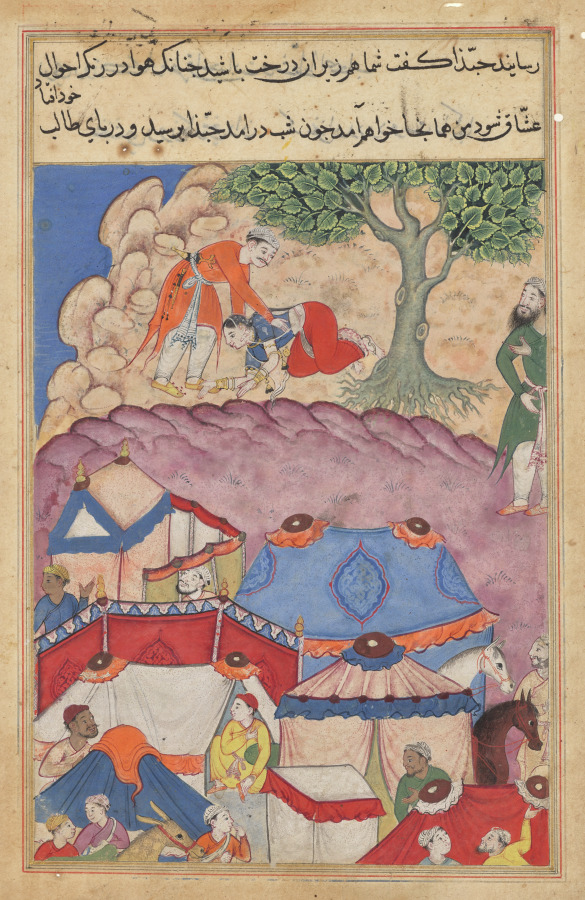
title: Habbaza meets Bashir under a tree, from a Tuti-nama (Tales of a Parrot): Twenty-fourth Night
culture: Mughal India, court of Akbar (reigned 1556–1605)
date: c. 1560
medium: gum tempera, ink, and gold on paper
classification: Painting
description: Habbaza clandestinely meets with her lover Bashir outside of her village. The two lovers have been separated by Habbaza’s husband, who learned of their affair. Bahir’s friend, who arranged the secret meeting, waits at the right. The lower register shows a scene of the activity in Habbaza’s village.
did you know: The dark sky indicates that this scene takes place at night.